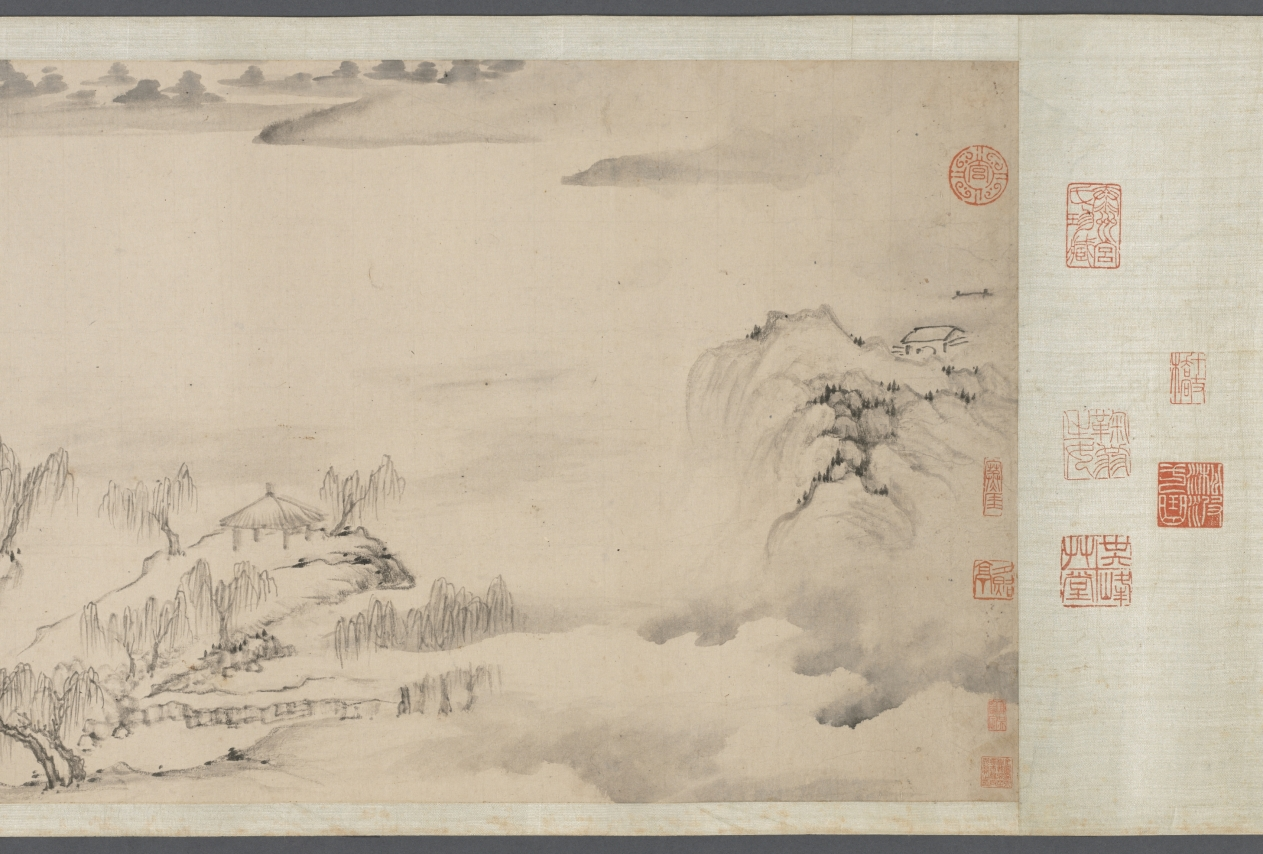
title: Spring Rain Thatched Hut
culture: China, Qing dynasty (1644-1911)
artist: Wang Jianzhang (Chinese, active 1621–1662)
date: 1650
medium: handscroll, ink on paper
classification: Drawing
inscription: Title by Wu Zhiying 吳芝瑛 (1868–1933), dated 1910.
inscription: 春雨草堂圖。庚寅仲春，為紫玄社兄畫於若耶溪上。 仲初王建章。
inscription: 12 colophons by Gong Weiliu’s 宮偉鏐 (1611–1680) contemporaries: Fang Gongqian 方拱乾 (1596–1667, jinshi of 1628); Jiang Cai 姜埰 (1607–1673); Liang Yizhang 梁以樟 (1608–1665); Du Shaokai 杜紹凱 (also named Du Jie 杜岕, 1617–after 1689), dated 1648; Zhao Kaixin 趙開心 (d. 1663), dated 1647; Zhao Erbian 趙而忭 (d. 1658); Yu Yaoguang 余耀光, dated 1649; Yao Quan 姚佺, dated 1648; Chen Taisun 陳台孫 (b. 1611, jinshi of 1640); (Monk) Shao 韶; Du Zhujin 杜祝進; and Tang Shi 唐時.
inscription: 此研田莊居士王建章為先太史紫元公所作春雨草堂圖也。居士字仲初，明崇禎間人，與先太史及惲香山相友善。喜畫佛像，自謂不讓李公麟。山水祖述董源，筆力雄健，有不可羈勒之概。香山稱其墨有五采，非世人所知。然性廉重，非同志不輕落筆，人得其寸圖尺縑，必相與忻賞，如獲蜼彝兕敦，非人世間物也！見先太史筆記，此圖寫雨景，而氣韻生動，勃勃於不能止。每一展覽，覺滿紙雲烟，墨瀋猶濕，如寫吾先人胸中未盡之邱壑也。圖後題詠，多一時名手，想見文采風流之盛。迄今二百餘年，舊德先疇，遺風未沫。吾子孫其永寶之，如與吾先人接謦咳於一堂，為感思之助，其敢作圖畫觀乎！同時香山亦有圖佚去己久，不知異日能為延津之合否。壬申長夏本昂重裝敬識。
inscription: Collectors' seals including: Gong Ben'ang 宮本昂 (1821–1874); Lian Qian 廉泉 (1868–1932); Wu Zhiying 吳芝瑛 (1868–1933)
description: With its striking simplicity, this painting captures the pure serenity of a private garden in the moist atmosphere of a spring morning on a small river. Painted in the style of Ni Zan, Wang Jianzhang dedicated this work to his patron-friend Gong Weiliu (1611-1680). Gong retired from government service after the fall of the Ming dynasty and constructed a garden-retreat at his native home in Taizhou, Jiangsu province. He invited scholars and poets from his literary society to contribute writings of his estate, which are here mounted together with the painting in this scroll.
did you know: Gong Weiliu, the owner of the estate portrayed here, had received his prestigious jinshi degree in 1643, but his official career was thwarted by the collapse of the Ming dynasty the following year.